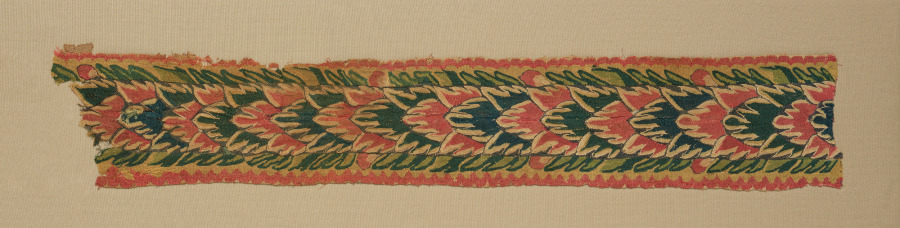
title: Panel from a Large Curtain, Overlapping Leaves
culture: Egypt, Byzantine period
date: 300s–400s CE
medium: Undyed linen and dyed wool: tapestry weave sewn on plain weave ground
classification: Textile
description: These colorful overlapping leaves with interspersed buds along the sides originally formed a decorative panel in a large curtain. Together with several similar designs, they alternated with areas of undyed linen decorated with scattered wool and linen tapestry-woven motifs. Although decorative motifs were often woven into the ground fabric, this panel was sewn on afterwards. During the late Roman and early Christian period curtains with woven or applied decoration were used in churches and Christian meeting rooms to separate the clergy from the congregation. They were also hung in doorways and between columns both inside and outside. Their importance is evident in numerous portraits of religious figures and laymen represented between curtained arches.